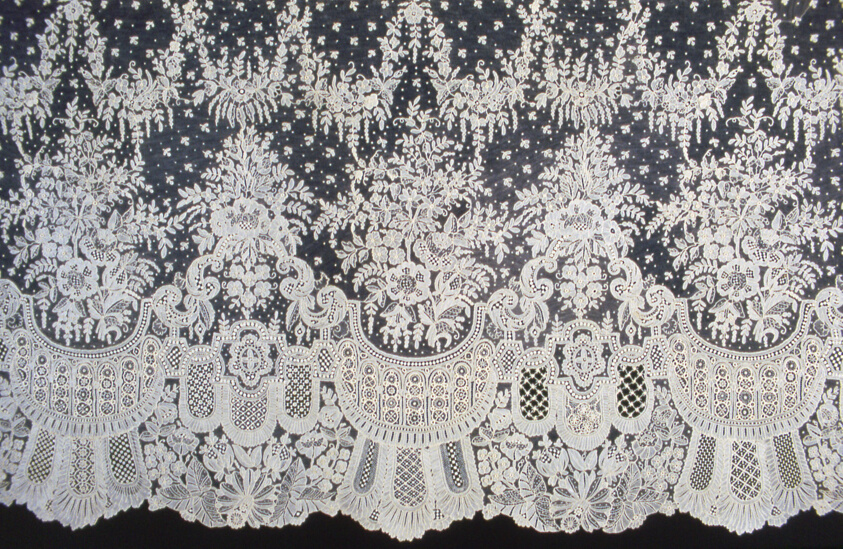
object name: Textile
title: Dress Flounce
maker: Belgium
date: 1860s (1862 or 1867)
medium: Cotton, needle lace of a type known as "Point de Gaze"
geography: Belgium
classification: textile; lace - needle